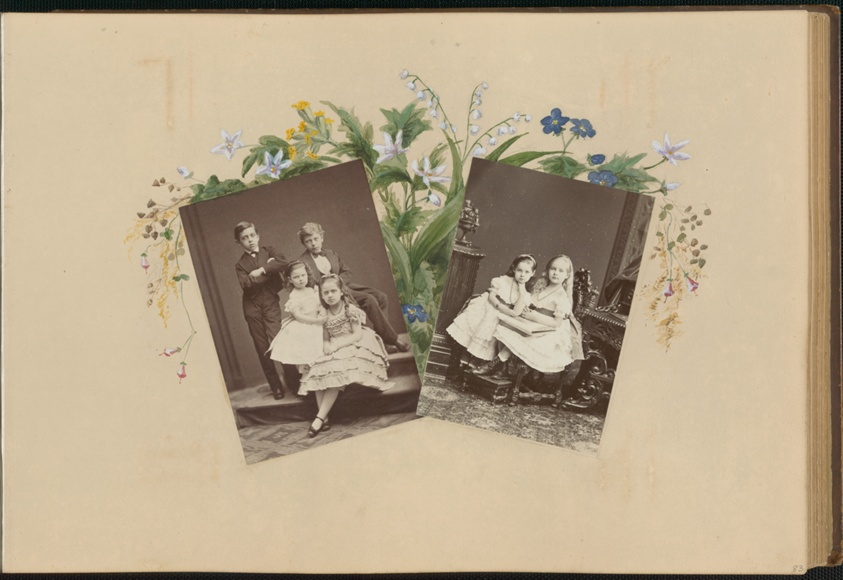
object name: Photograph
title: The Madame B Album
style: 19th century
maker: Marie-Blanche Hennelle Fournier (French, 1831–1906)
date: 1870s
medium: Albumen prints with watercolor (in album)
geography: France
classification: photograph; albumen silver print; photography